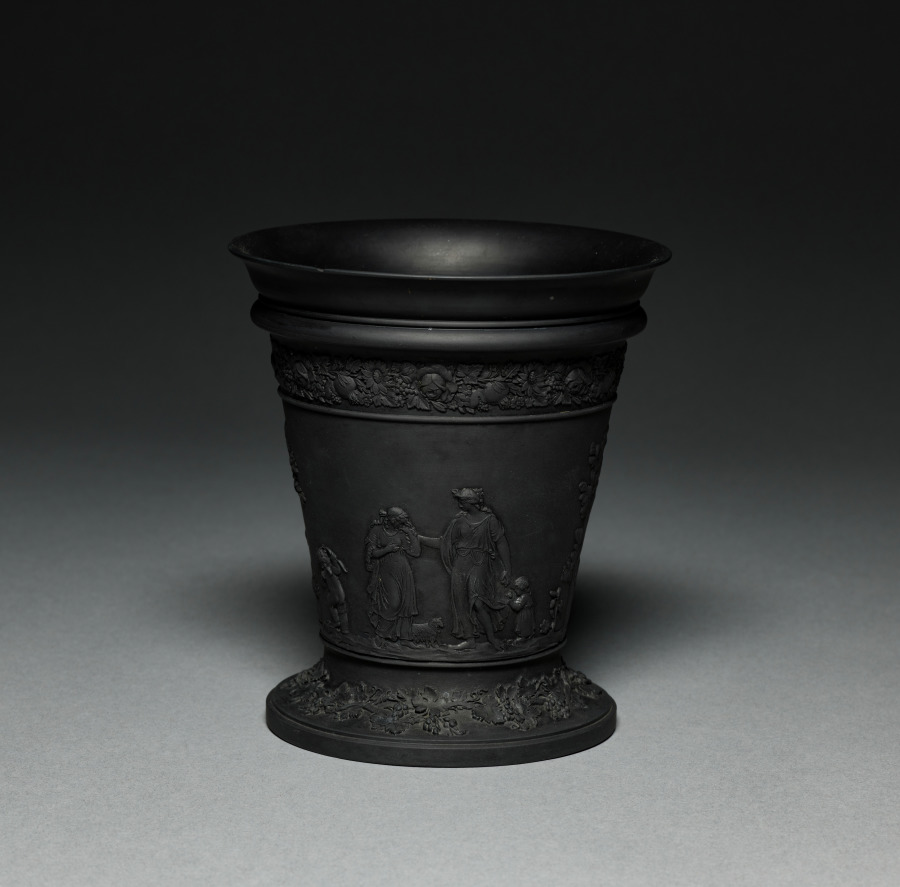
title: Jardiniere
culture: England, Staffordshire, 18th century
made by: Wedgwood Factory (British)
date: late 1700s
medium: black basalt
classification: Ceramic